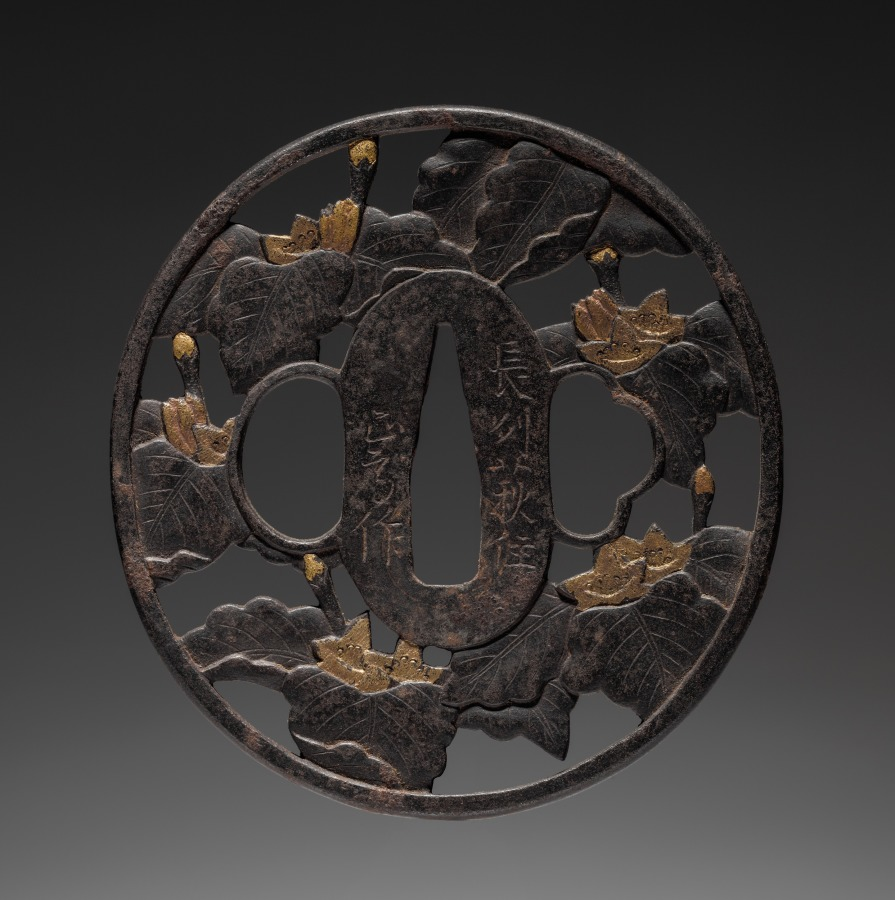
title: Sword Guard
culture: Japan, Edo period (1615–1868)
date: mid-1800s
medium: iron (Choshu type)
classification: Arms and Armor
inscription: signed "Masataka, residing at Hagi, Nagato province, made."